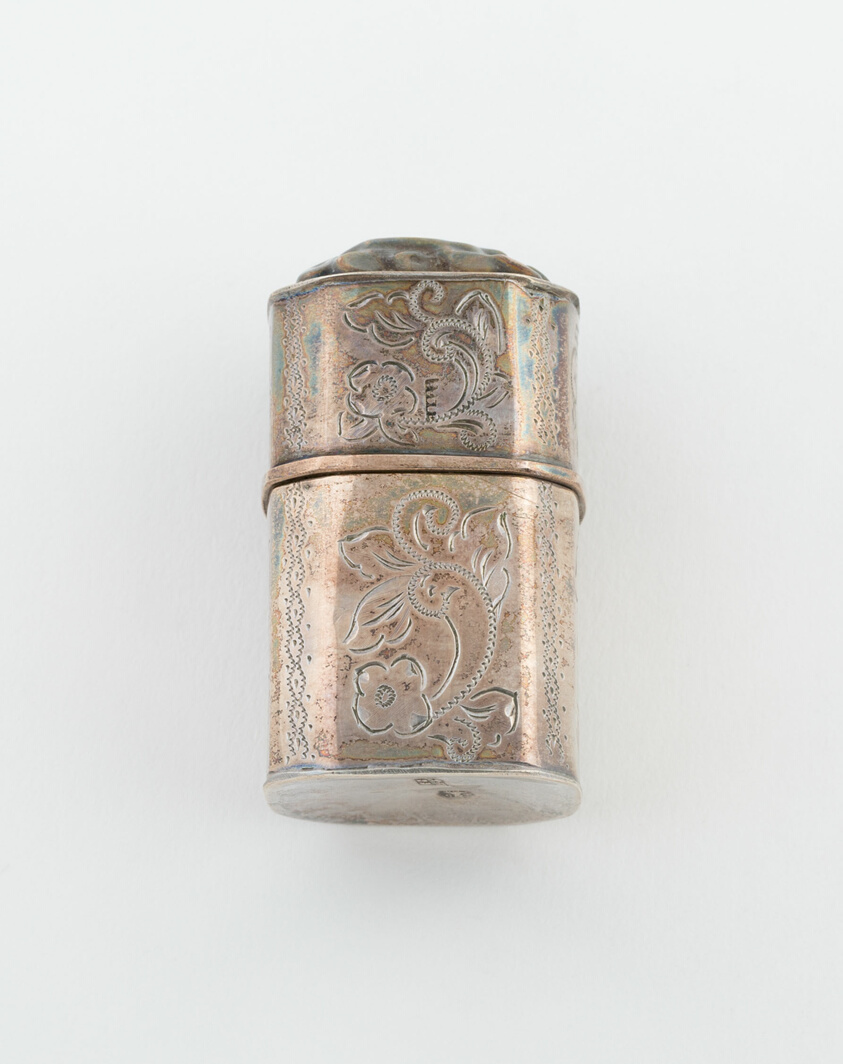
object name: Metalwork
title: Sponge Box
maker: Carolus Hendericus Cammans; Dutch, active c. 1860-c. 1882; Leeuwarden/Gronigen, Netherlands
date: 1878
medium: Silver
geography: Netherlands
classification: container for personal use; box; european decorative arts; metalwork; silver; decorative object/ornament